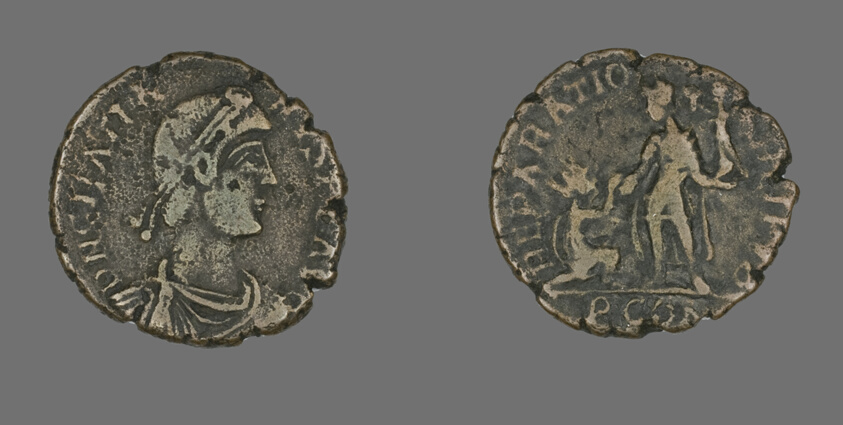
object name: Coin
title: Coin Portraying Emperor Gratian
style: roman (ancient, style or period), ancient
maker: Roman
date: 367-383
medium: Bronze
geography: Roman Empire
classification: coin; ancient art